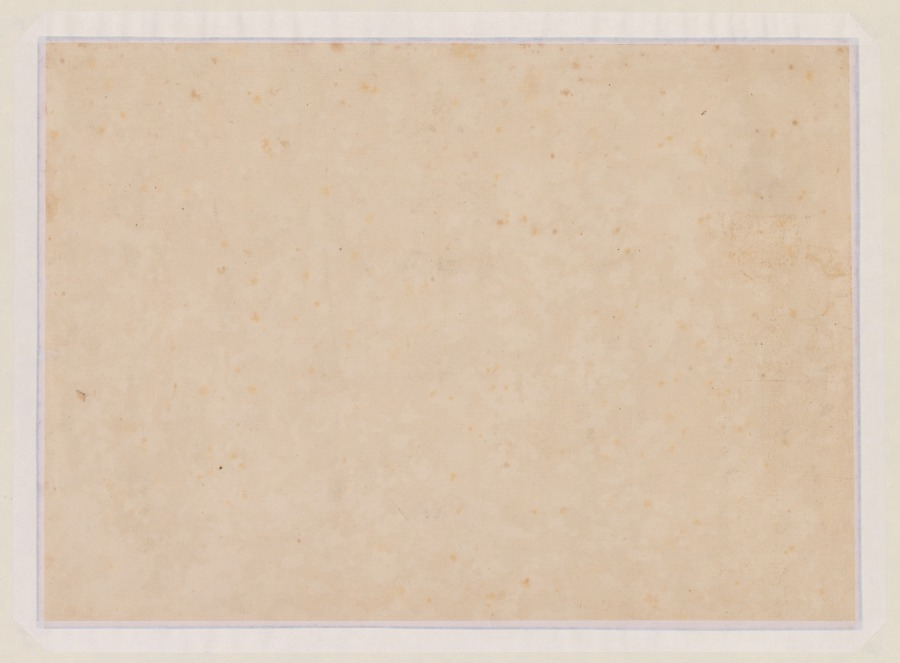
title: Rest on the Flight to Egypt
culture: France, 19th- 20th century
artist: Luc-Olivier Merson (French, 1846–1920)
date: c. 1879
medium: charcoal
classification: Drawing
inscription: lower right: L. Olivier Merson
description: This charcoal sketch relates to an oil painting that was tremendously popular at the 1879 Paris Salon. In both works, Luc-Olivier Merson depicted the Holy Family finding refuge in a massive sphinx sculpture during the rest on the flight into Egypt. The drawing may have been an independent work or, more likely, a study for the painting or a related print.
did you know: Despite the detail of his depictions on the subject, Luc-Olivier Merson never traveled to North Africa.